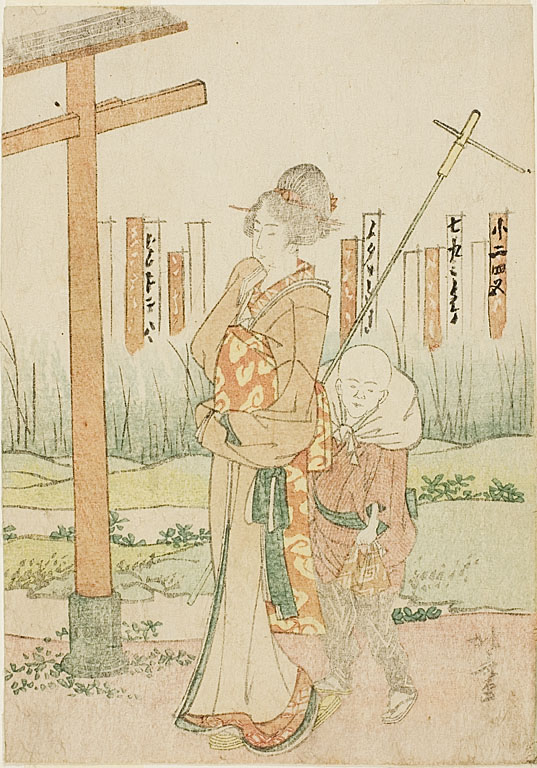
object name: Print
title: A Woman and a Boy at Shrine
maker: Katsushika Hokusai 葛飾 北斎; Japanese, 1760-1849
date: 1804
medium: Color woodblock print; surimono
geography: Japan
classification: woodblock print; print; asian art